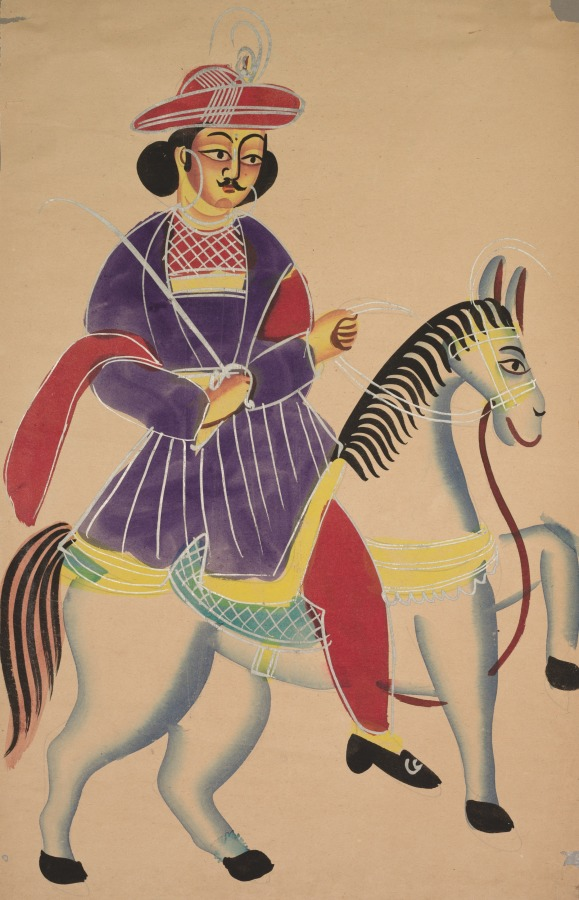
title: Raja Riding a Horse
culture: Eastern India, Bengal, Kolkata, Kalighat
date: c. 1890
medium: Gum tempera, graphite, and ink on paper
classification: Painting